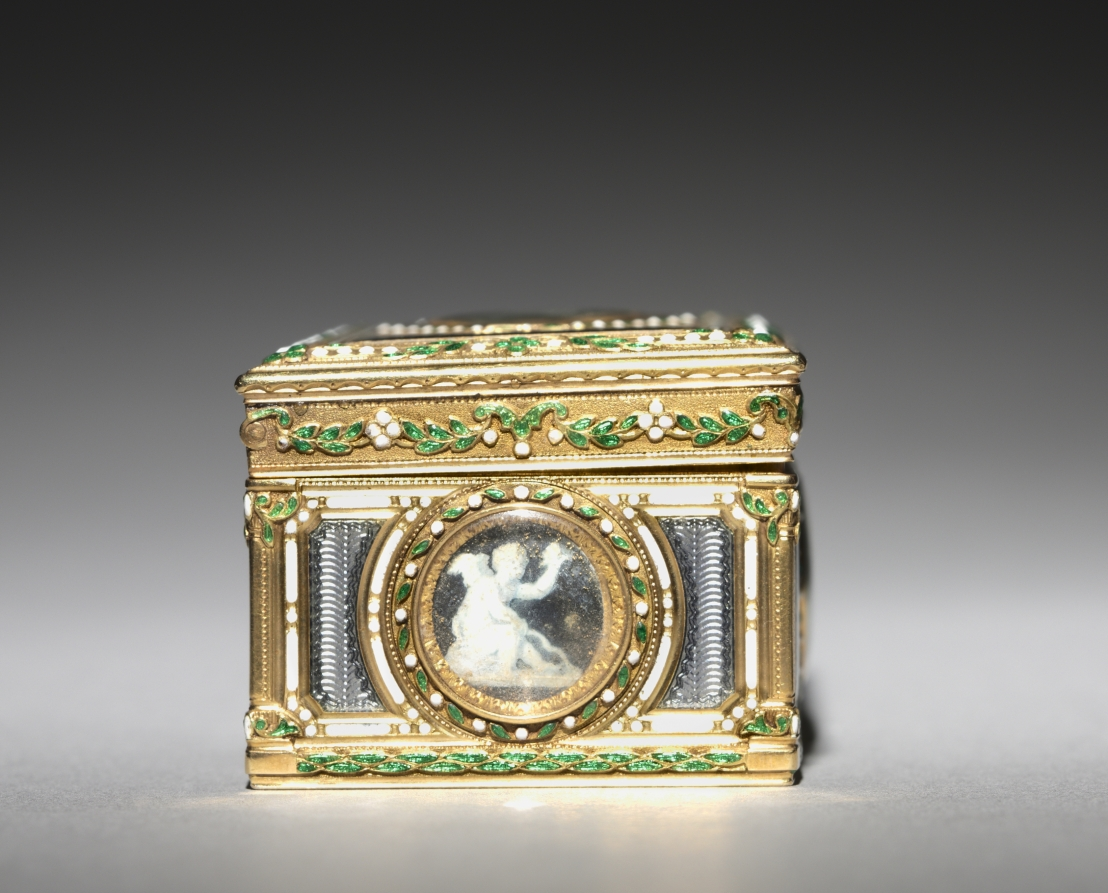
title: Snuff Box (Tabatière)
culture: France, 18th century (style of Louis XVI)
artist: François Chazeray (French)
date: 1777–78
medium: gold and enamel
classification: Metalwork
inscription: [Maker's mark of François Chazeray, master goldsmith in 1760, cover; bottom; front wall]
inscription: [Warden's mark (probably a crowned "O"), Paris, 1777-1778, cover; bottom; front wall]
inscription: [Illegible mark, bottom]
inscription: [Illegible mark, cover]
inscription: [Illegible charge mark, inside front]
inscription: [Discharge mark of Jean-Baptiste Fouache, Paris, 1774-1780, on neck at left.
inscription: [Outside of neck, modern inscription '4 (modern inscription]:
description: This box is decorated with figures of antiquity associated with love: winged cupids, dancing nymphs, and representations of the Greek goddess of love. These scenes are inspired by antique cameos, intricately carved gemstones crafted in ancient Greece and Rome. This interest in ancient iconography, symmetry, and classical compositions of gods and goddesses was characteristic of 18th-century neoclassicism.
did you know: Decorated with allegorical scenes of love, it is likely that this box was a present between lovers.